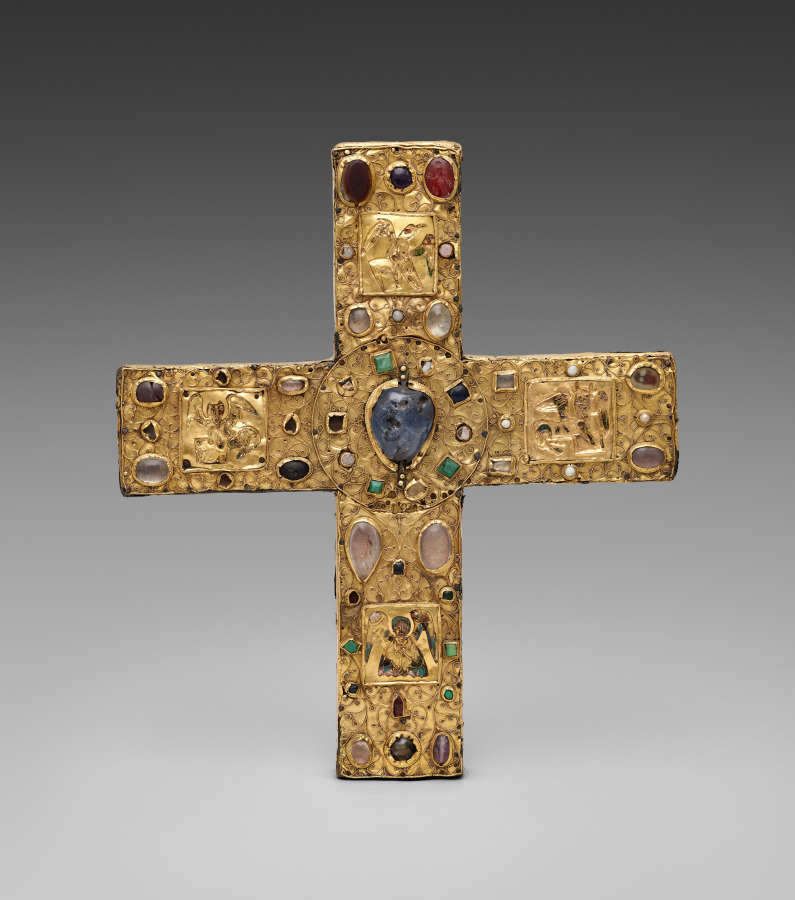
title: Ceremonial Cross of Countess Gertrude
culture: Germany, Lower Saxony?, 11th century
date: 1038 or shortly after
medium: gold: worked in repoussé; cloisonné enamel, intaglio gems, pearls, wood core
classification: Metalwork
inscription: translation of inscription on back: For the Relics of the Holy Apostle Peter and the Holy Virgin Liutrudis, Countess Gertrude Ordered this made.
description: This precious gold cross was commissioned by Countess Gertrude (died 1077) and given to the church of Saint Blaise following the death of her husband, Count Liudolf of Brunswick (died 1038). The cross was intended to be carried in liturgical processions or to be placed on a church altar. The inclusion of relics within the crosses endowed them with an additional role as devotional objects. At the center of the four cross arms, fine but much damaged cloisonné enamel plaques represent the symbols of the four Evangelists--an eagle for Saint John (above); a lion for Saint Mark (on the left); an ox for Saint Luke (on the right); and an angel for Saint Matthew (below). Pearls and precious and semiprecious stones are set within an intricate network of gold filigree while a large sapphire, inscribed in a circle and likewise surrounded by pearls and precious stones, is placed at the crossing.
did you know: Countess Gertrude's name appears on the back of the cross at the bottom.